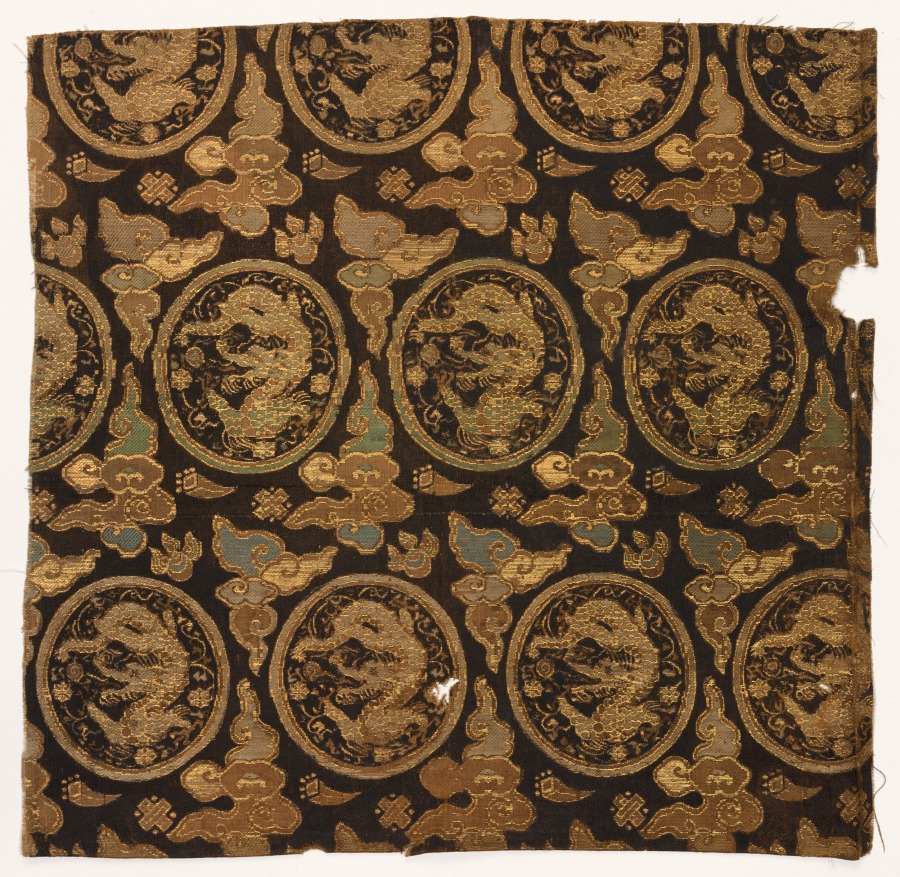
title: Silk Textile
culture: Japan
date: 1700s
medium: silk, metallic thread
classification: Textile